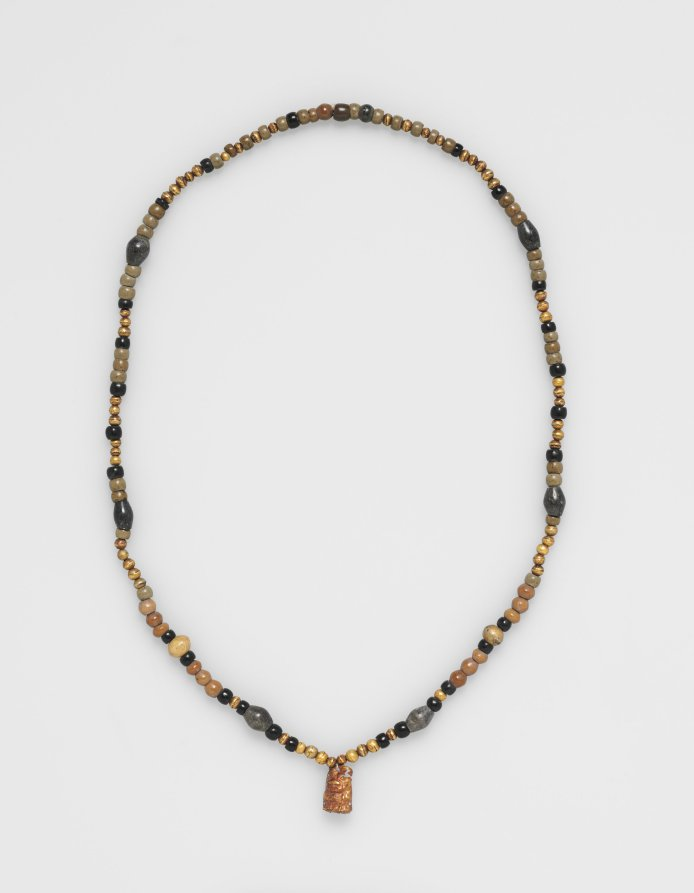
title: Necklace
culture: Peru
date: before 1532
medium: gold with gray and black polished stone beads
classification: Jewelry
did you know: These ancient beads were restrung in modern times.